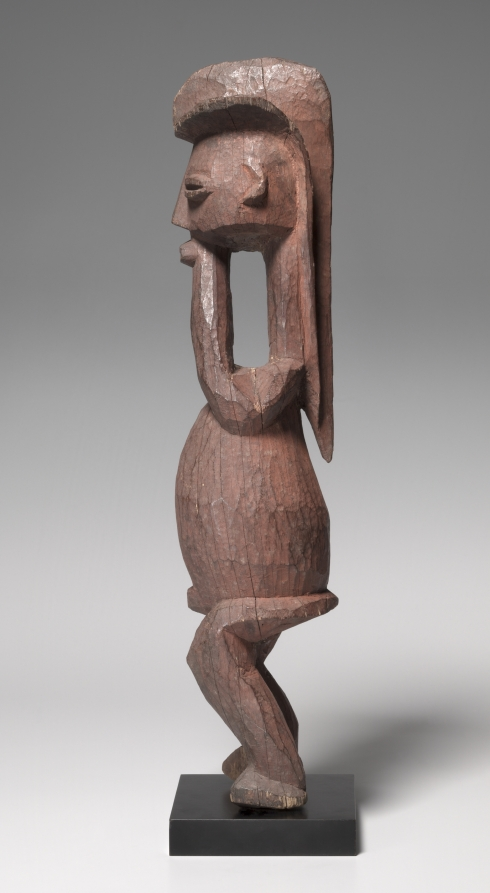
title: Male Figure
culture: Africa, Central Africa, Democratic Republic of Congo, Hungaan-style maker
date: mid- to late 1800s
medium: Wood and colorant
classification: Sculpture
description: Hungaan figures of this size served as guardians of ritual shrines and functioned in rituals to promote fertility, guarantee well-being, and ensure longevity. The striking crested hairstyle imitates a real coiffure or a wig, indicative of status and prestige. The hands supporting the chin identify the figure as a chief who is immersed in thought and contemplation, pondering over his responsibilities.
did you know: The red powdery surface of this figure mimics a red body adornment that mixed ground camwood with palm oil.